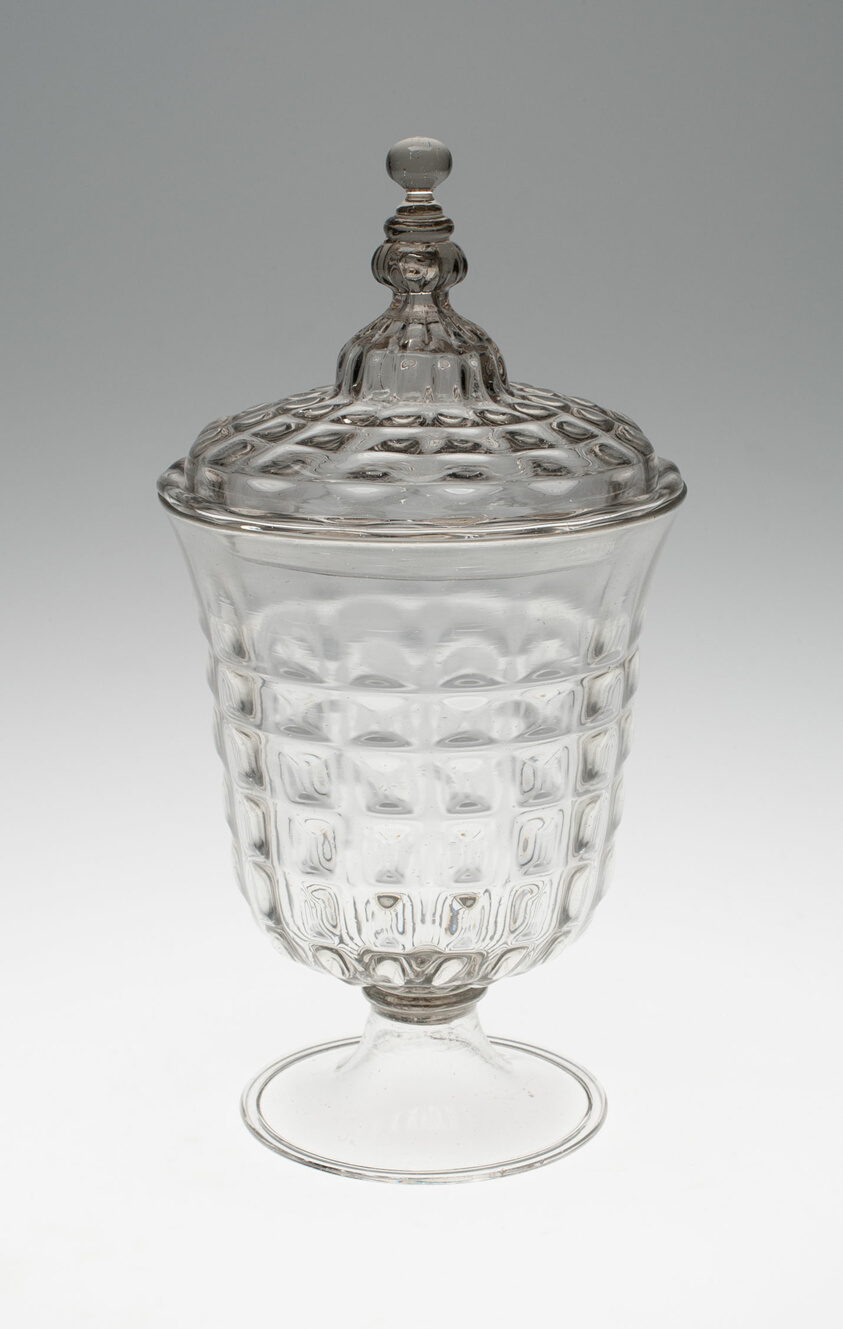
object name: Glass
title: Covered Cup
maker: Belgium, Antwerp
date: Late 16th century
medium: Glass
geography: Belgium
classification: drinking vessel; glass; european decorative arts